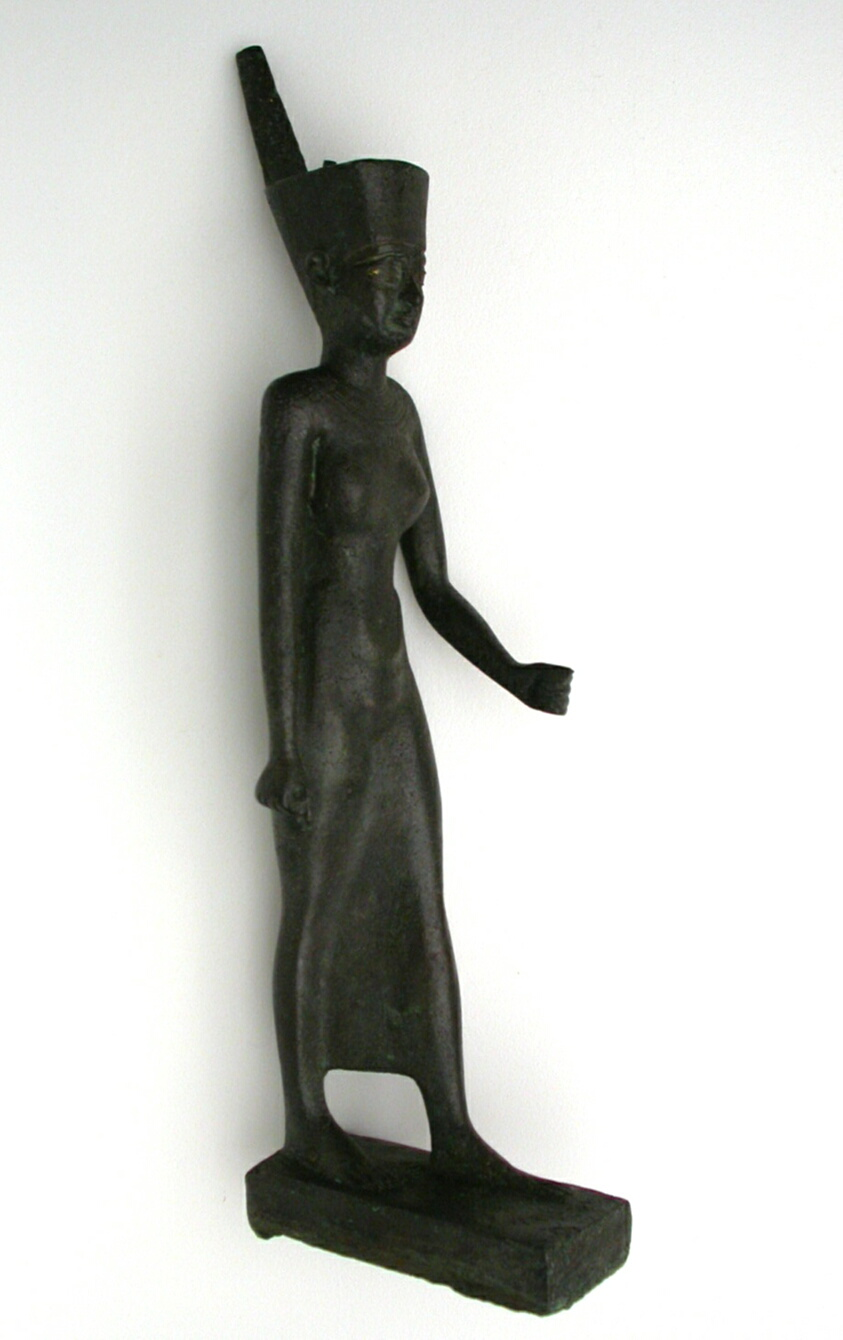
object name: Sculpture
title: Statuette of the Goddess Neith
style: late period (egyptian), twenty-sixth dynasty, saite period, egyptian, ancient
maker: Egyptian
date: Late Period, Dynasty 26 (664–525 BCE)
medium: Bronze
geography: Egypt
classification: statuette; bronze; metal; sculpture; ancient art; votive offering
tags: goddesses